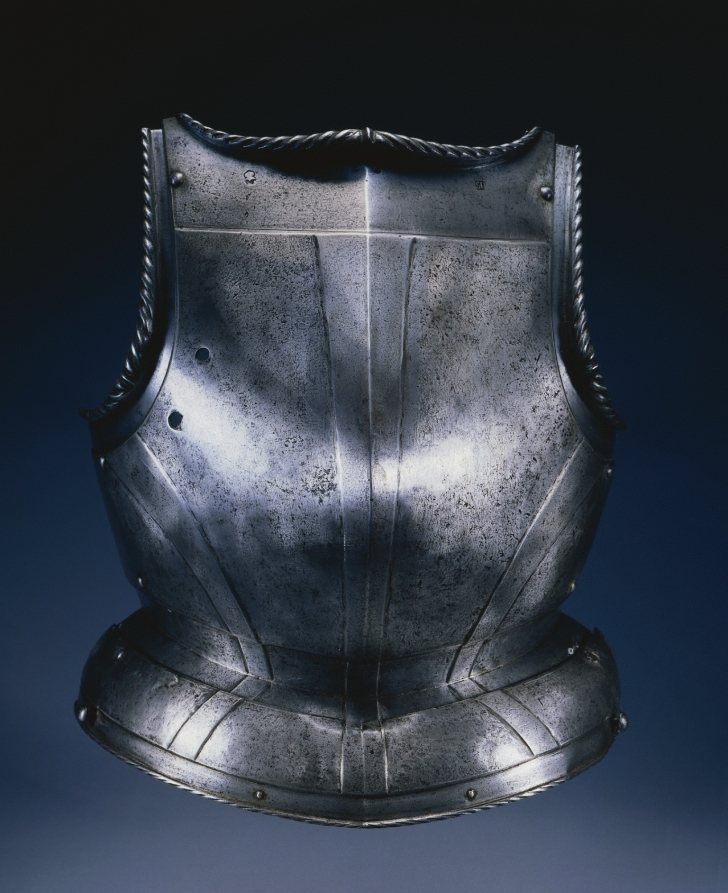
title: Breastplate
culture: Germany, Landshut, mid-16th century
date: mid-1500s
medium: steel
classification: Arms and Armor